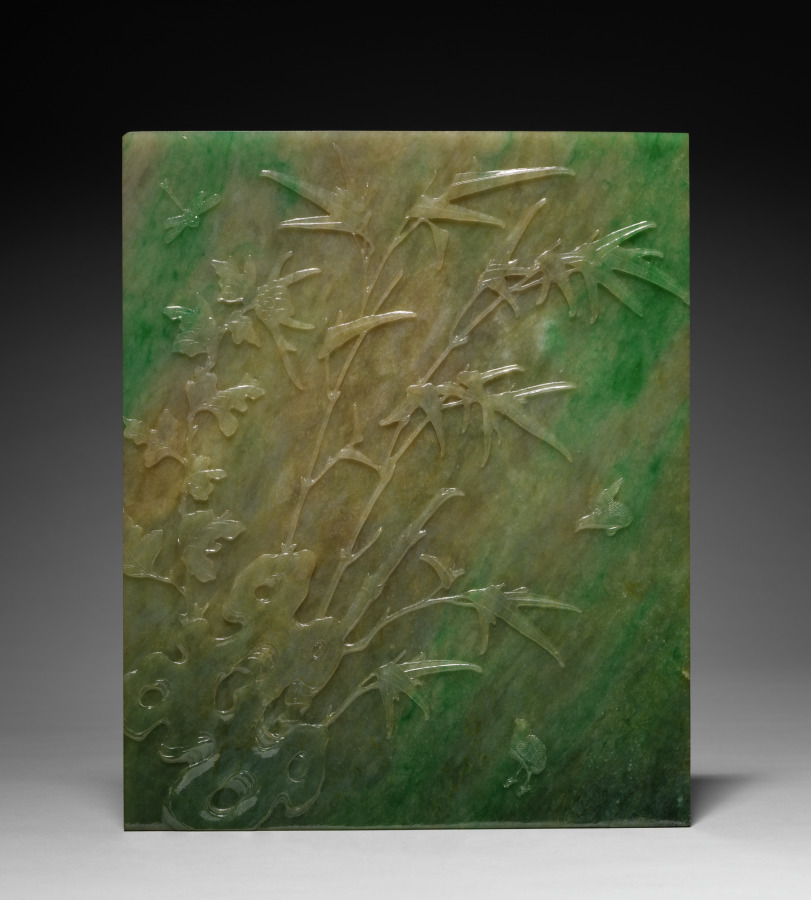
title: Table Screen with Stand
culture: China, Qing dynasty (1644-1911)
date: 1644–1911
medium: jade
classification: Jade